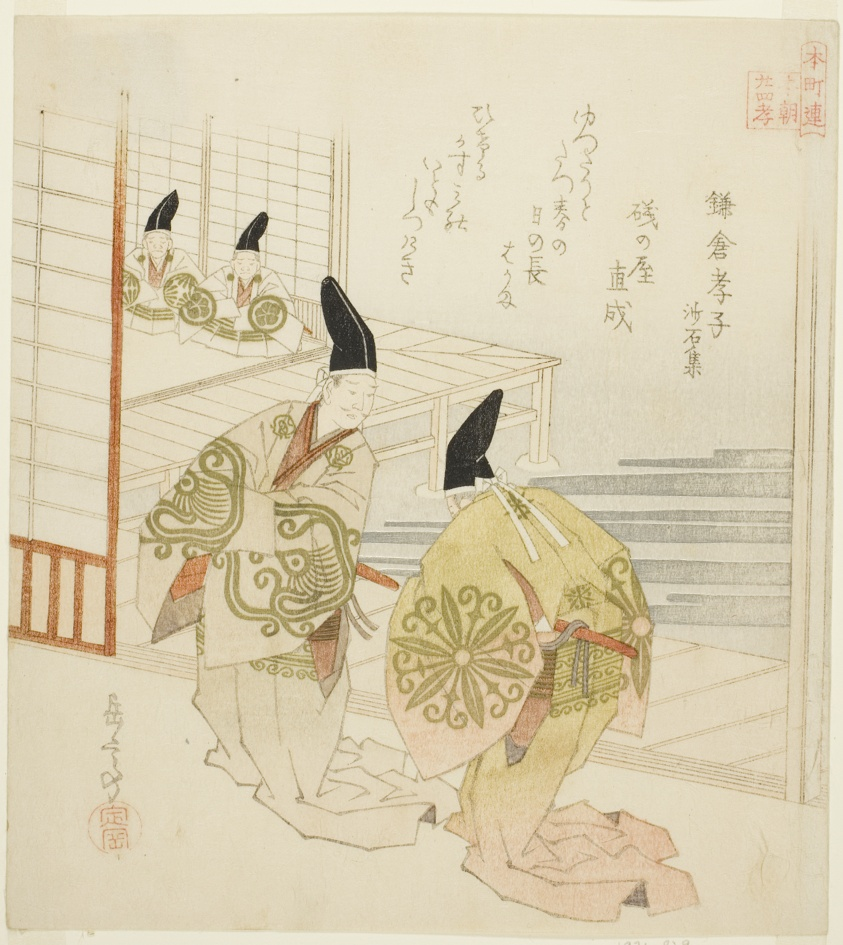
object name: Print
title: The Filial Son of Kamakura from the Collection of Stone and Sand (Kamakura koshi, Shasekishu), from the series "Twenty-four Japanese Paragons of Filial Piety for the Honcho Circle (Honchoren Honcho nijushiko)"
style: Japanese (culture or style)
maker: Yashima Gakutei (Japanese, 1786 (?)-1868)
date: c. 1821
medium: Color woodblock print; shikishiban, surimono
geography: Japan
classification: woodblock print; print; asian art